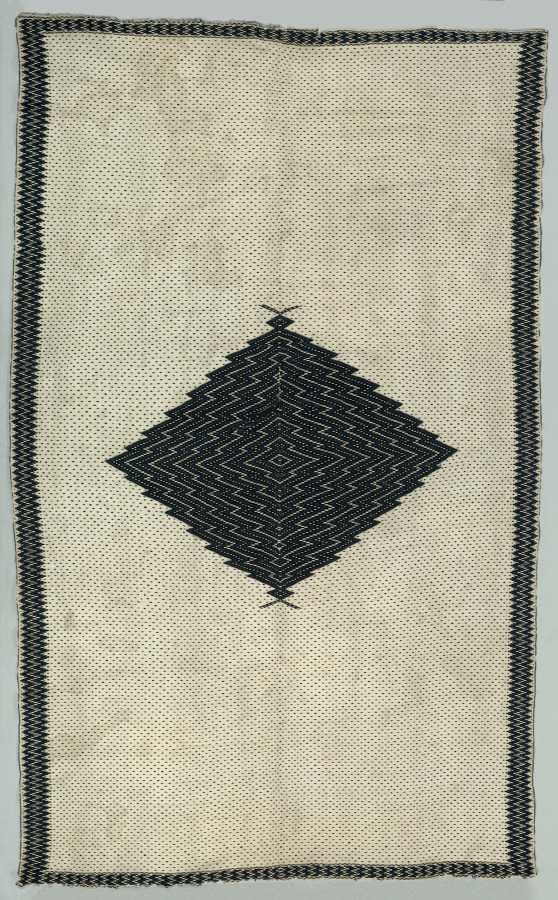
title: Saltillo Sarape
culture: Mexico, Coahuila state, Saltillo Region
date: c. 1820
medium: Wool, cotton; tapestry weave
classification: Textile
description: The sarape (wearing blanket) is a classic Mexican men’s garment that became a symbol of national identity and pride after Mexico achieved independence from Spain in 1821. Examples woven between about 1750 and 1875 in Saltillo, a town in northern Mexico, are the sarape’s most famous representatives, prized for their design, color, and technical refinement.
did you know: Saltillo sarapes (wearing blankets) are prized for their design, color, and technical refinement.